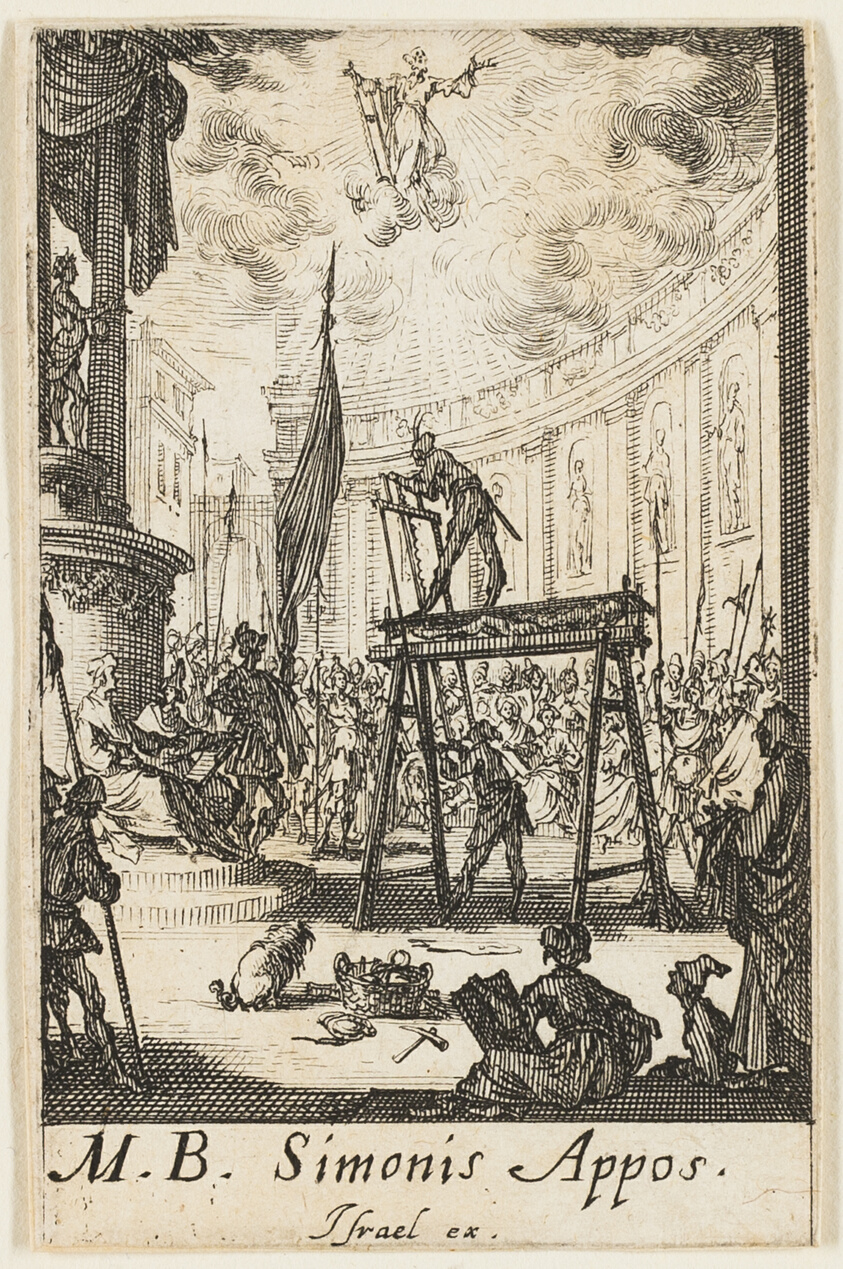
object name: Print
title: Martyrdom of Saint Simon, plate ten from The Martyrdoms of the Apostles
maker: Jacques Callot (French, 1592-1635)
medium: Etching on paper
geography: France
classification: etching; print; prints and drawing